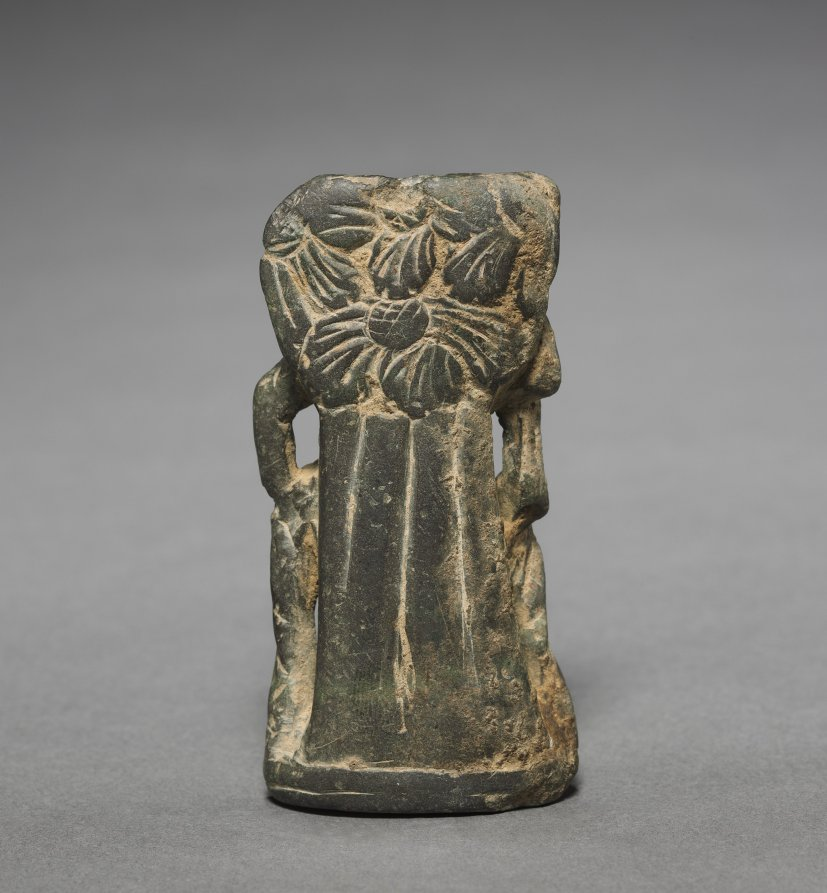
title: Shalabhanjika (Woman and Tree)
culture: Northern India, Kashmir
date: 300s–400s CE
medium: gray steatite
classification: Sculpture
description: The full carving of a flowering tree on the back of this figurine indicates that she is a figure of a nature divinity who personifies the life-giving qualities of the sap that envigorates the tree and causes it to flower. These figures are sometimes called shalabhanjika, "she who breaks the tree," probably because her fertile properties are so powerful that it causes the tree to fruit so heavily that the branches break.